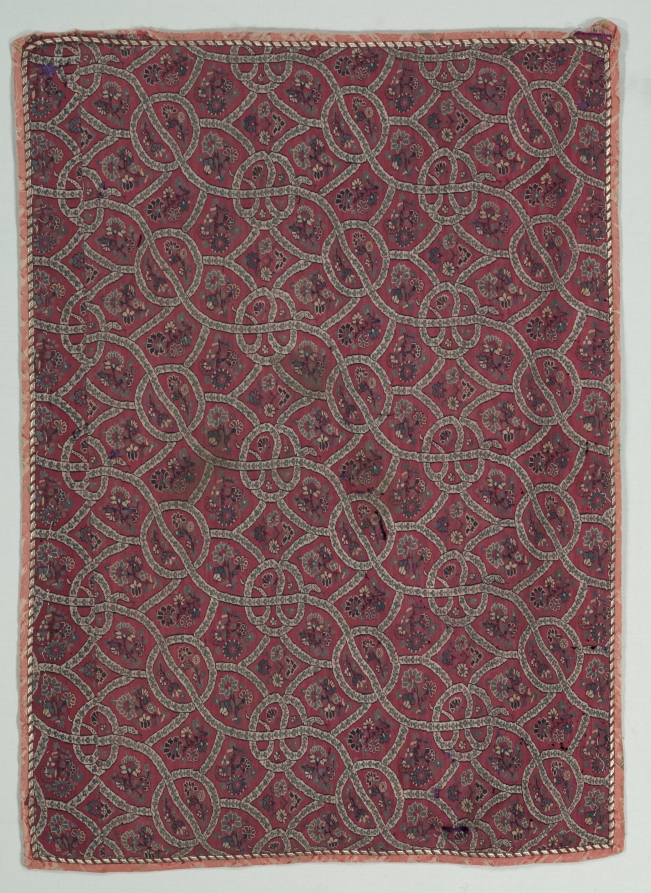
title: Fragment, Snakes and Flowers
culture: India, Kashmir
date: 1790–1810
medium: wool; 2/2 twill tapestry (S), double interlocked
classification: Textile